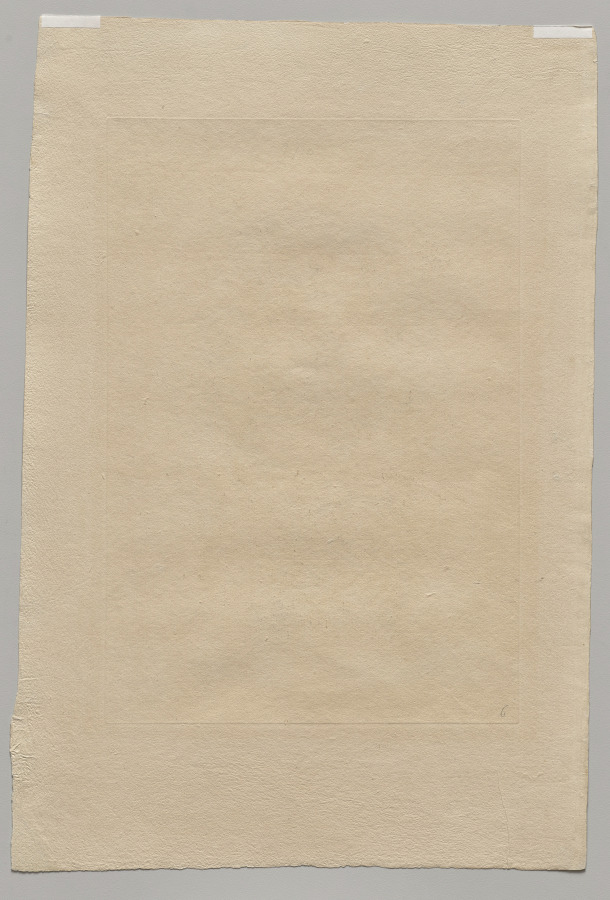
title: Persian Flowers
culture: France, 18th century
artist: Jean Baptiste Pillement (French, 1728–1808)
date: 1755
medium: etching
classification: Print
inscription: Watermark: top half of Dovecote, left side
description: Jean Baptiste Pillement was one of the most influential designers of the Rococo period, known for his varied and prolific chinoiseries (European variants of Chinese and Japanese motifs). His designs were spread throughout Europe primarily via their translation into prints. This print is one of a set of six etched by Pillement himself. Each depicts a so-called “Persian” flower, largely fantasies, presenting strange, alienlike floral forms that could be adapted to various uses from textiles to wall decorations.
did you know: The artist Jean Baptiste Pillement was employed by Marie Antoinette to create decorations for her legendary retreat, the Petit Trianon, at Versailles.